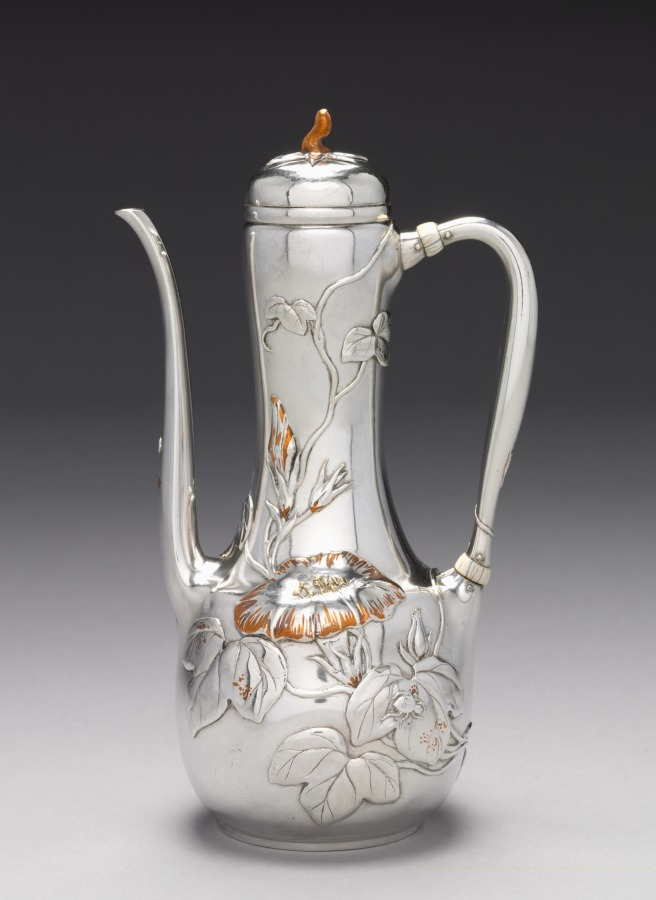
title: Coffee Pot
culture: America, New York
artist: Tiffany & Co. (America, New York, est. 1837)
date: c. 1879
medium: silver inlaid with copper and gold, ivory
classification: Silver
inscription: engraved: E.J.W.B.\from\A.M.\Xmas 1879. (The A.M. may refer to Alfred Morrison, a wealthy man who supported contemporary decorative arts by collecting them for his London house.)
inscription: Stamped underside: "Tiffany + Co.\ 5401 Makers 441\ Sterling Silver\ -and-\ other metals\ 907